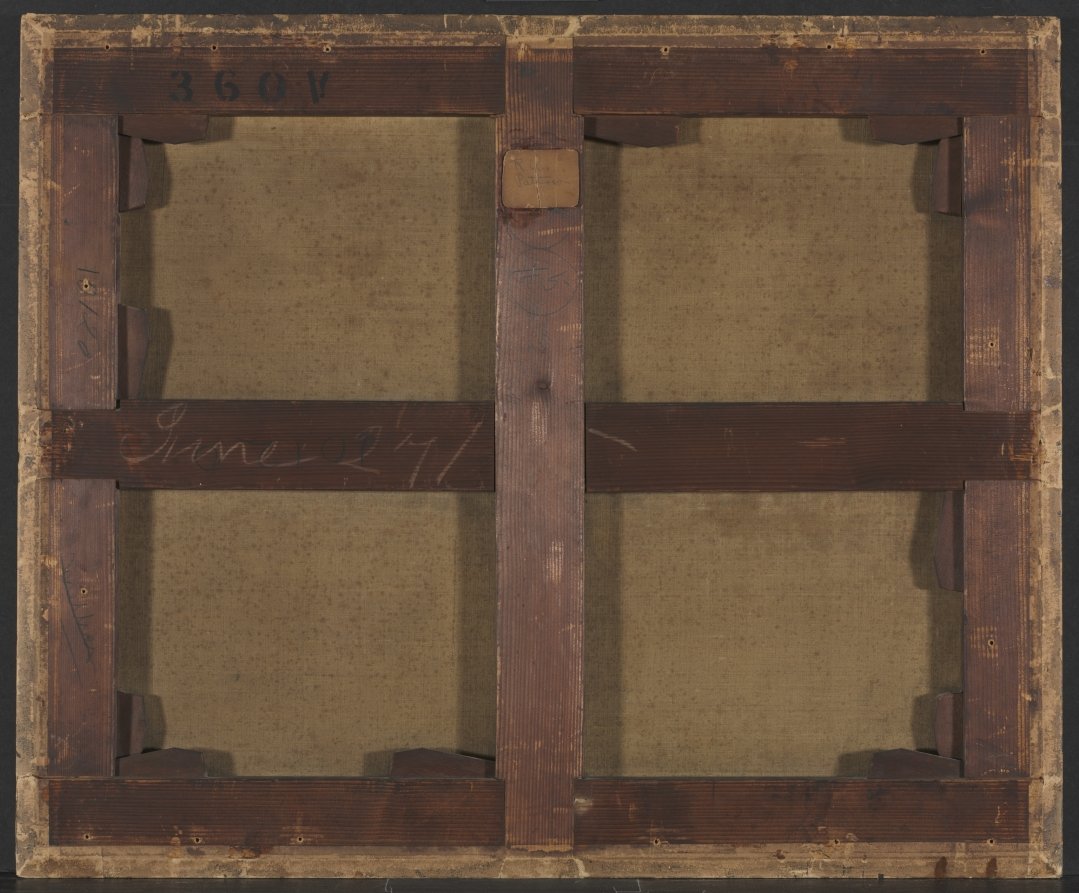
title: English Warship Firing a Salute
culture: Netherlands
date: 1690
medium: oil on canvas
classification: Painting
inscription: Front, lower center near edge, signed and dated in paint Reverse: top stretcher, stencil "360 V"; hand written in pencil "Left"; hand written in pencil (red) "18"; Vertical center bar: Label with hand written pencil "K.L Patterson"; hand written pencil " #5"; Signed lower center: "W. V. Velde J. 1690"; horizontal center bar: hand written w/grease pencil "10120".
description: Van de Velde and his father picked up their lives in Amsterdam in 1672 and moved to England to paint for the king. Their paintings of the Royal Navy’s massive ships celebrated England’s power in war and trade.